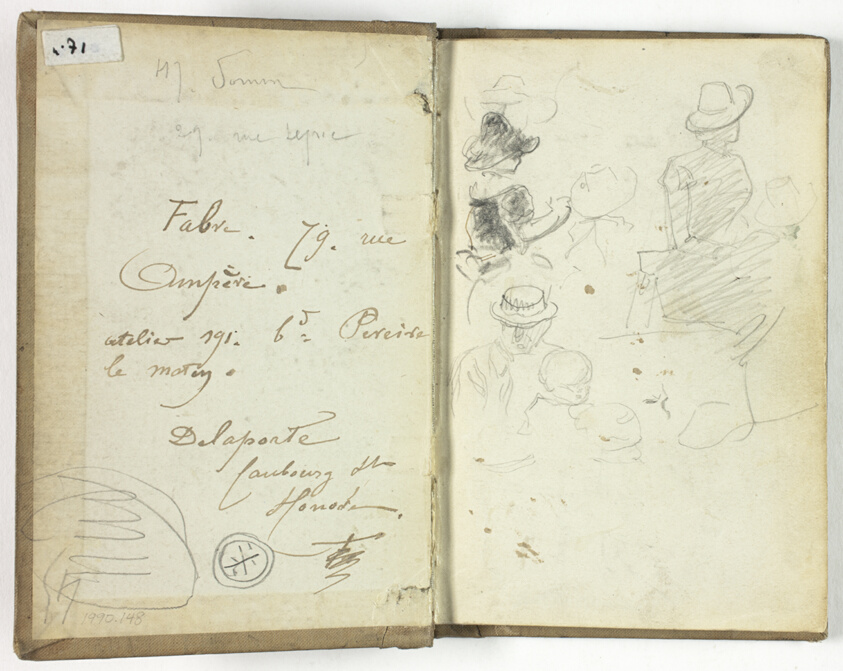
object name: Book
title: Sketchbook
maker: Henry Somm; French, 1844-1907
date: c. 1885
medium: Pen and black, brown, and blue inks and graphite on ivory wove paper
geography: France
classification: sketchbook; pen and ink drawings; prints and drawing; book